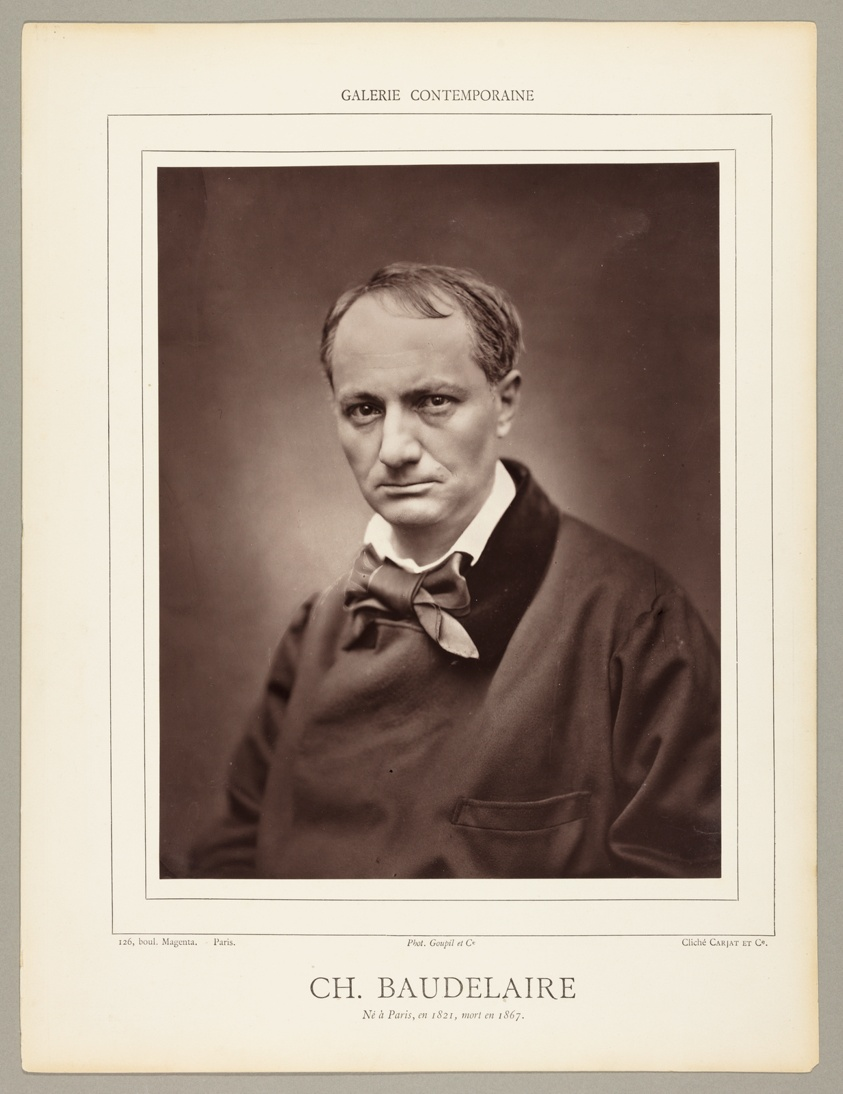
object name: Photograph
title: Charles Baudelaire (French poet, critic, and writer, 1821-1867)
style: 19th century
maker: Etienne Carjat (French 1828–1906)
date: c. 1863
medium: Woodburytype, from the periodical “Galerie Contemporaine Littéraire, Artistique” (1878), volume 5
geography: France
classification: woodburytype; photomechanical process; photography; photograph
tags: Collected by Hugh Edwards, Paris, Contemporaine Littéraire